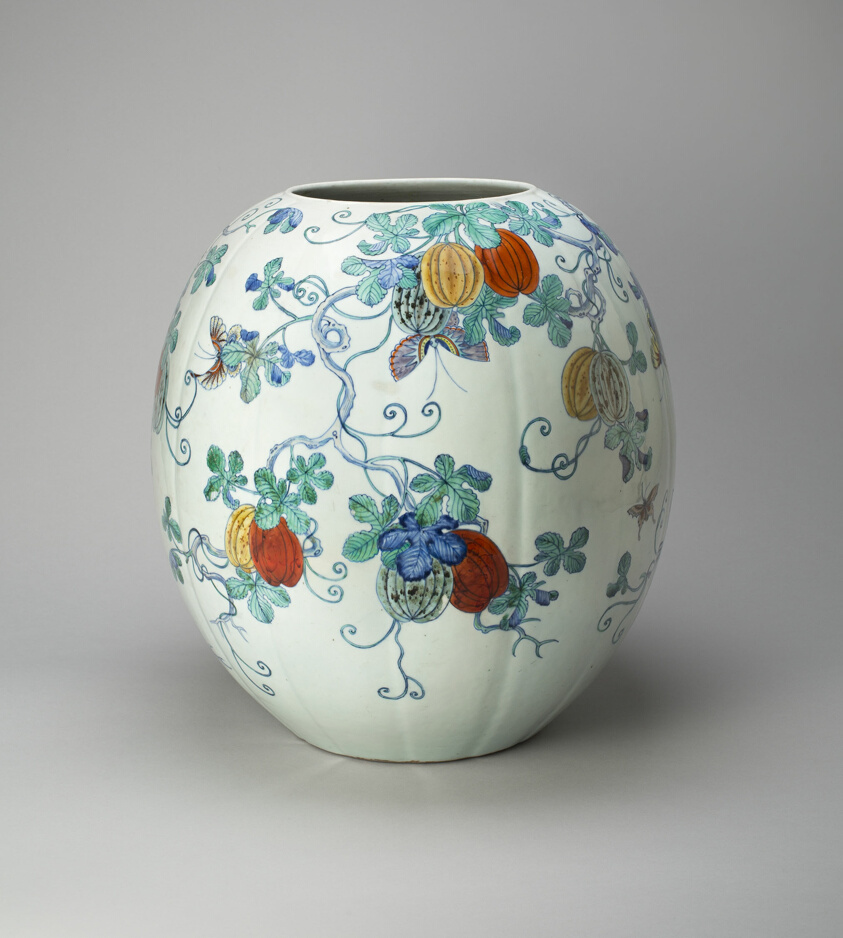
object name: Vessel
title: Melon-Shaped Jar with Butterflies, Gourds, and Scrolling Vines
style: Chinese (culture or style)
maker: China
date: Qing dynasty (1644–1911), Yongzheng (1723–35) or early Qianlong period (1736–95), 18th century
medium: Porcelain painted with underglaze blue and overglaze enamels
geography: China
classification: porcelain; ceramics; asian art; vessel